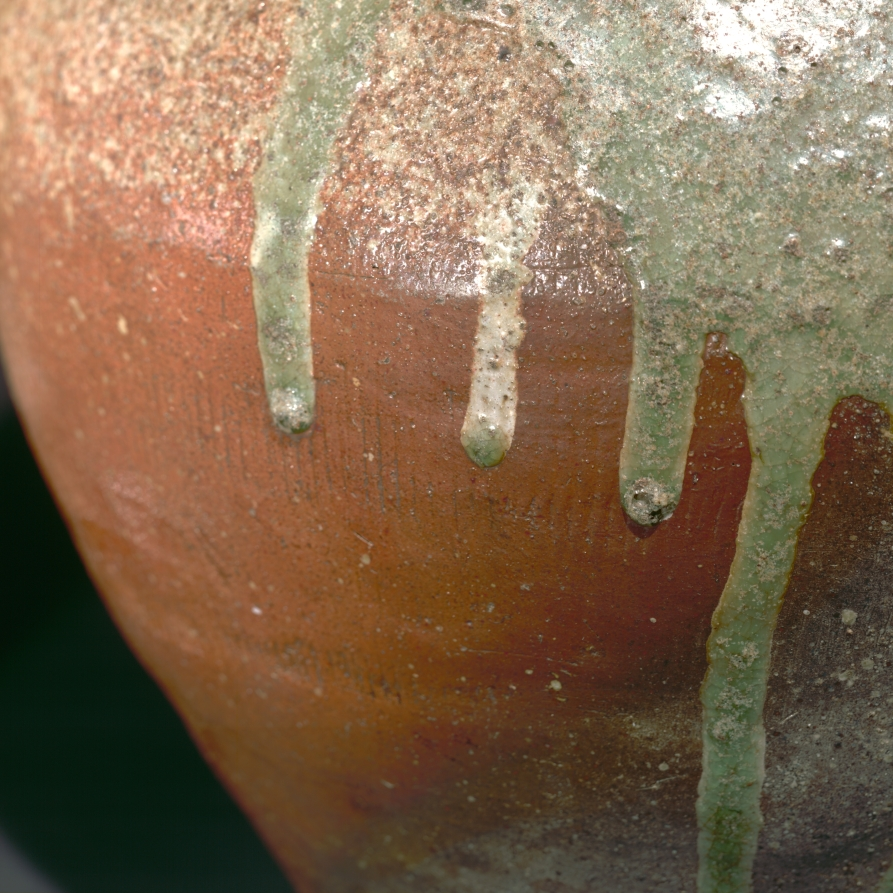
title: Storage Jar: Tamba Ware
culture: Japan, Muromachi period (1392–1573)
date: 1400s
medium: stoneware with natural ash glaze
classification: Ceramic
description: This vessel served as a storage container for rice or other grains in medieval farming communities. The piece was made by potters in Tamba, a fertile region west of Kyoto which used such vessels to send its agricultural products to towns throughout western Japan. Tamba ware is recognized by its warm green glaze, created as accumulations of natural wood ash settle on the clay body and liquefy when the kiln temperature is sufficiently high. The jar's contours reveal that it was built in four stages from many clay coils pressed together by hand. The smooth neck and mouth were wheel-turned. The vertical, incised lines visible on the reddish-brown body indicate where a comb-like tool scraped excess clay from the body wall; this technique helped conserve clay material and wood used in the firing. The scraping also exposes the grittiness of local Tamba clay, which in the 15th century did not undergo an extensive refining process.